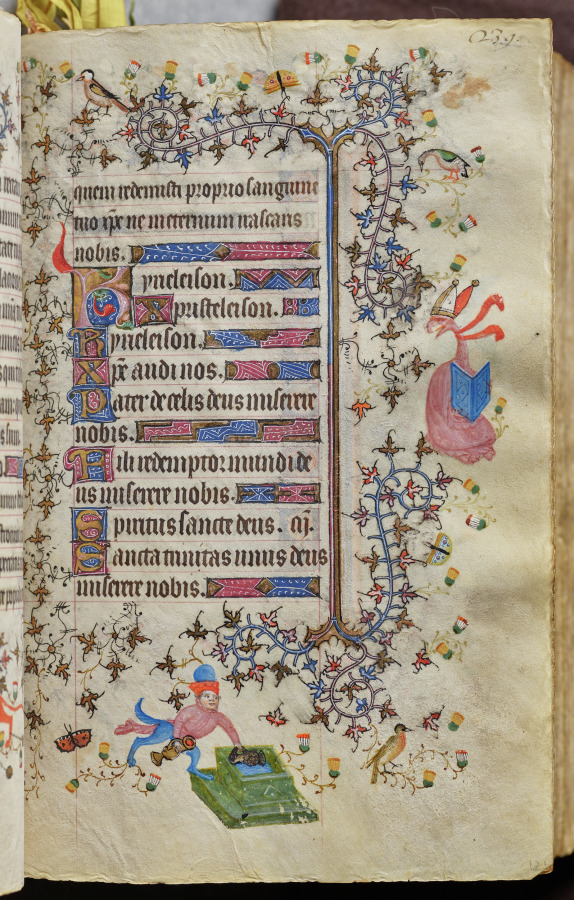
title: Hours of Charles the Noble, King of Navarre (1361-1425): fol. 120r, Text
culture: France, Paris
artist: Master of the Brussels Initials and Associates (French)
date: c. 1405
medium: ink, tempera, and gold on vellum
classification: Bound Volume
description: This precious volume was obviously highly prized by its owner, the French-born King of Navarre, who had his coat of arms painted on no less than twenty folios. Rather than directly commissioning this manuscript from a specific workshop, it seems that Charles the Noble acquired his book of hours -- perhaps ready-made for the luxury market -- while on a trip to Paris in 1404-05. A collaborative effort, six painting styles are evidenced within the pages of this codex, those of two Italians, two Frenchmen, and two Netherlanders. The painter who was responsible for the planning and decoration of the book, and who produced seventeen of the large miniatures, was a Bolognese artist known as the Master of the Brussels Initials. His principal assistant, responsible for most of the borders, was a Florentine who signed his name "Zecho" da Firenze on folio 208 verso.